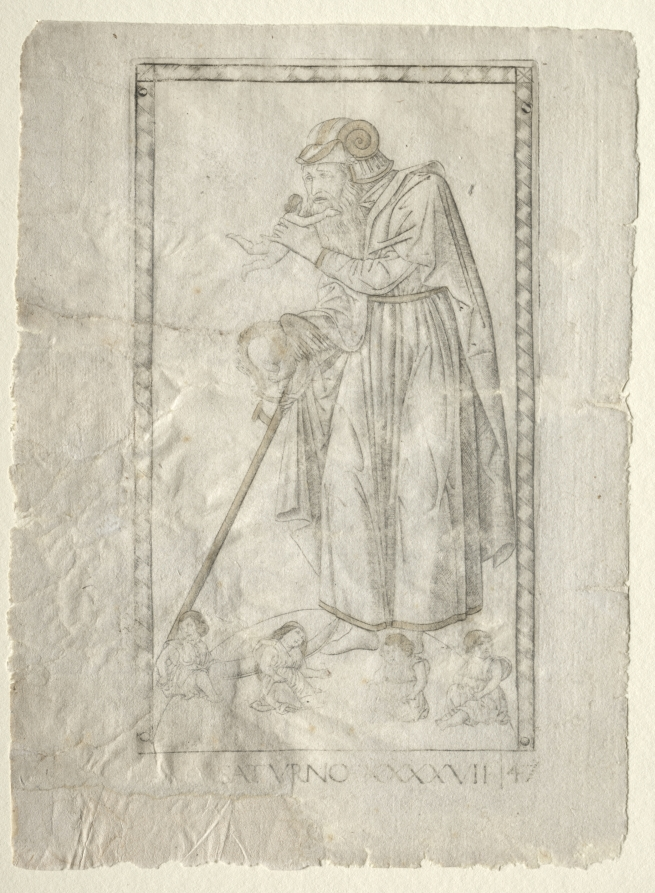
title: Saturn (from the Tarocchi, series A: Firmaments of the Universe, #47)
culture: Italy, Ferrara, 15th century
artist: Master of the E-Series Tarocchi (Italian, active 1460s)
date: before 1467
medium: engraving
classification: Print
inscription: Lettered below the image of SATVURNO (Saturn): [A] / ·SATVURNO XXXXVII· / 47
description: This engraving is part of the Tarocchi group marked with the letter “A”, and named Firmaments of the Universe. This series comprises the seven planets from the classical astronomy (Moon, Mercury, Venus, Sun, Mars, Jupiter, Saturn) and the three celestial spheres that separate them from the Supreme Entity (Prima Causa) from which everything was originated. Here, Saturno (Saturn) is personified as a full-length old male figure, turned to left. He rests on his sickle, at the top of which is a serpent biting its own tail. Saturn is about to devour one of his children, whilst the other four are seated at his feet.